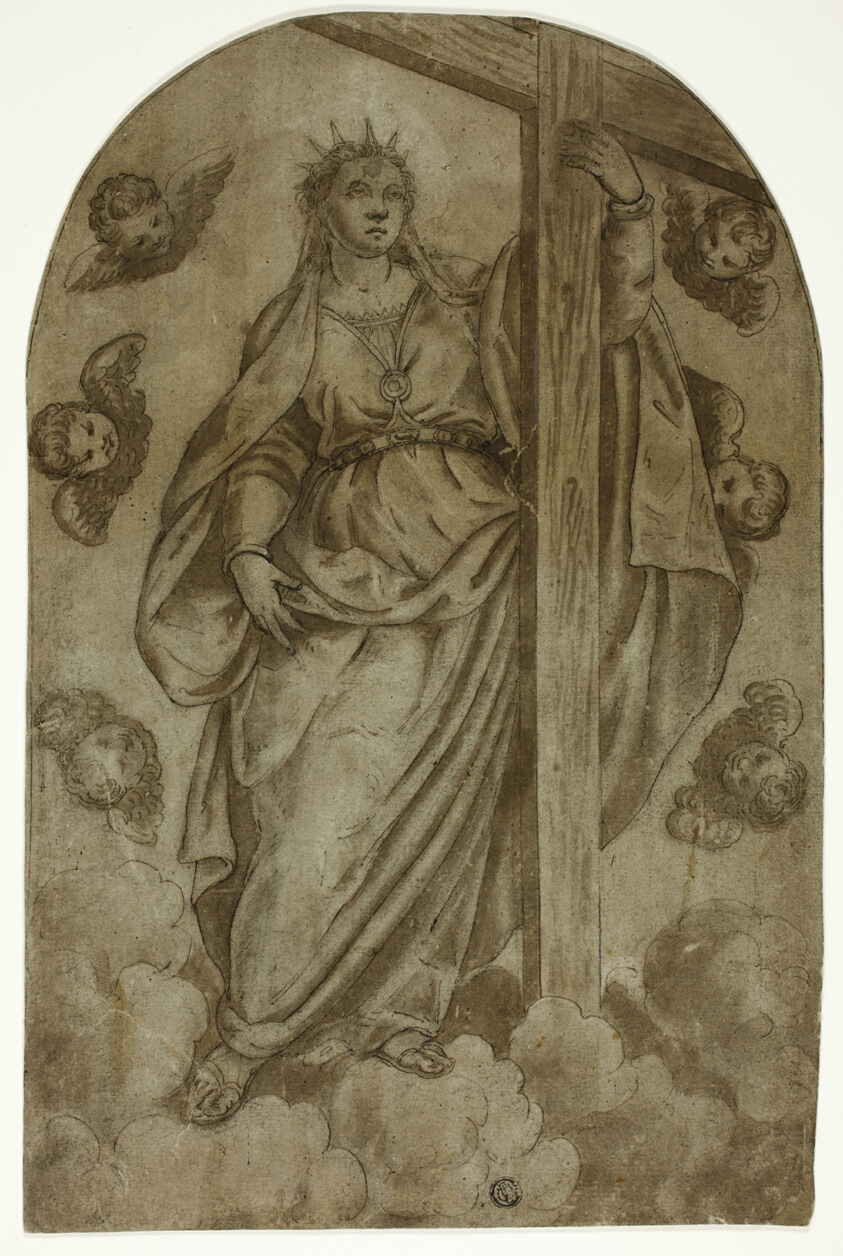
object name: Drawing and Watercolor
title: Saint Helena and the True Cross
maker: Italian; Late 16th Century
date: 1580/90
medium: Pen and brown ink with brush and brown wash, over black chalk, on lunette-shaped blue-brown laid paper, laid down on ivory laid paper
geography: Italy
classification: ink with wash; drawings (visual works); prints and drawing